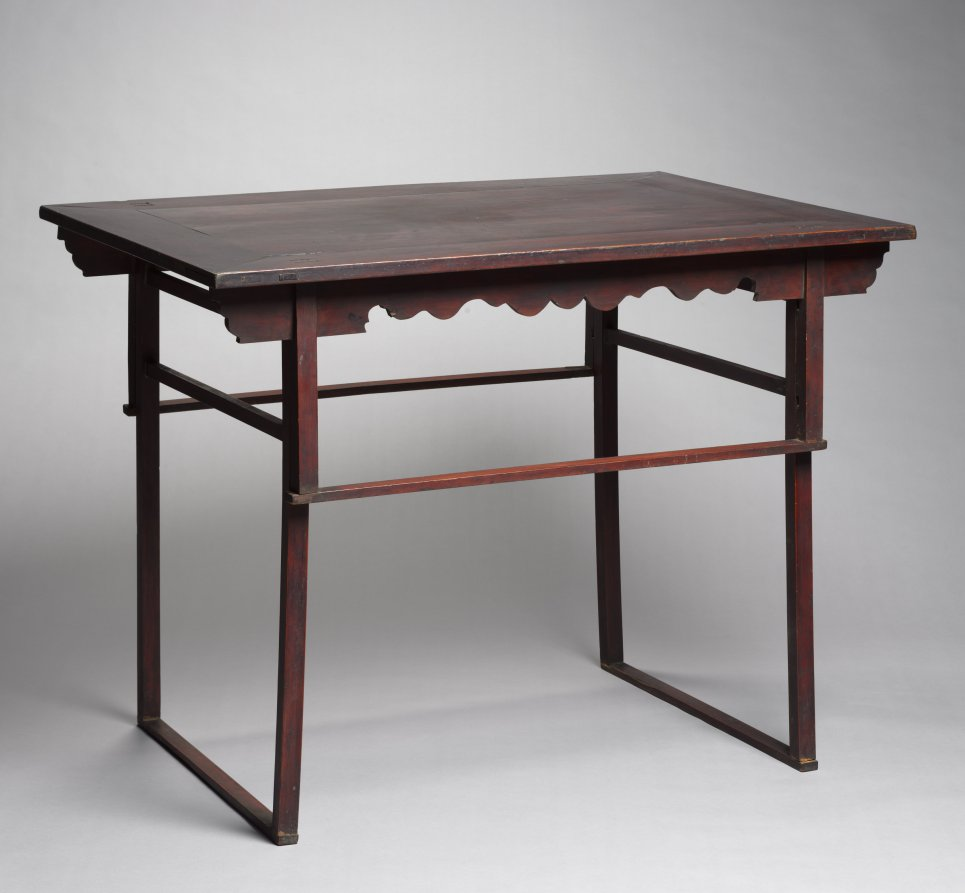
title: Folding Table (Che-Sang) for Memorial Service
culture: Korea, Joseon dynasty (1392–1910)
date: 1900s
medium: pine nut wood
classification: Furniture and woodwork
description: Many homes in premodern Korean society had a memorial shrine for preparing and holding ancestral rites. Placed on the top of a tall chair, this miniature edifice (called the spirit house) served as a temporary residence for visiting ancestral spirits. On the table, a variety of delicacies such as fruits, rice, meat, and wine would be placed to treat those spiritual guests.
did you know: The belief in two types of souls, the spiritual and the corporeal, embodied the core concept of ancestral worship in traditional China and Korea. While the corporeal soul is believed to reside in the tomb, the spiritual soul, in the spirit house, guards his or her decedents.